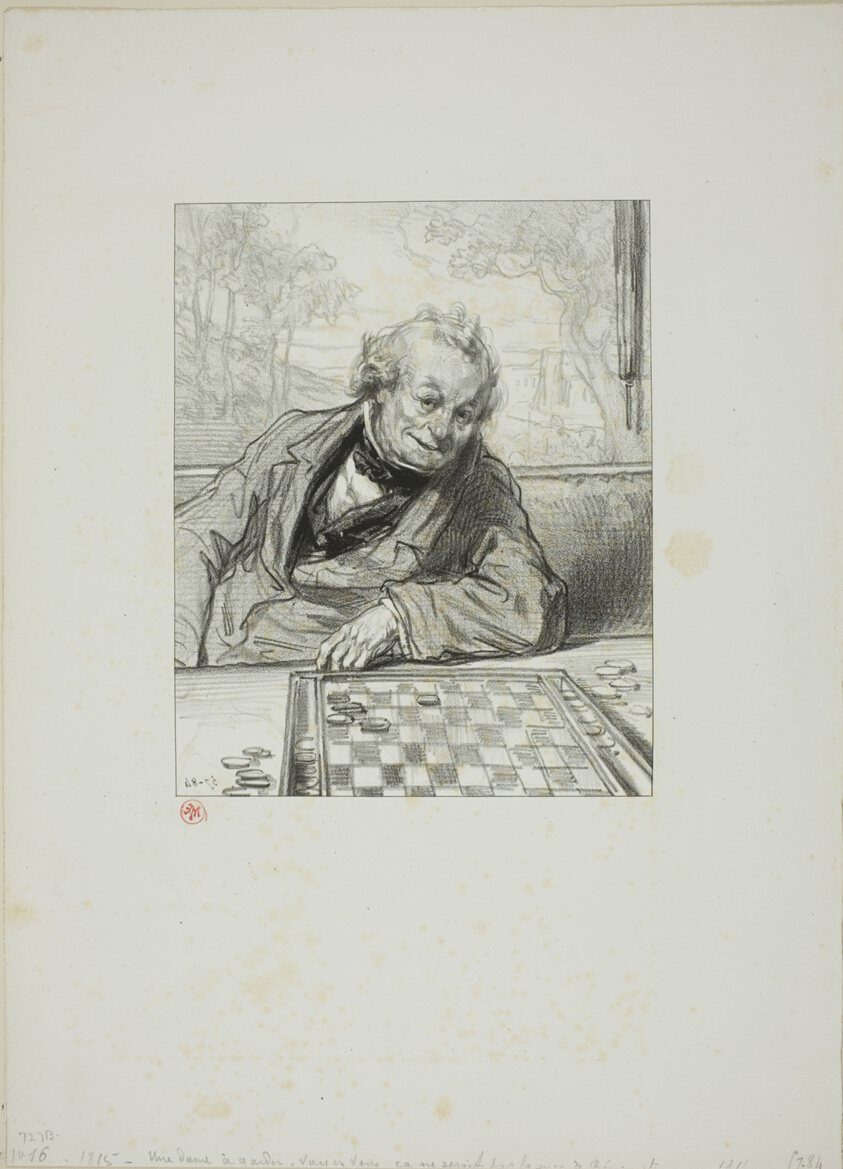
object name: Print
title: Maska and faces: Keeping a Queen, you see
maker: Paul Gavarni (French, 1804-1866)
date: 1857–58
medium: Lithograph in black on ivory wove paper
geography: France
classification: lithograph; print; prints and drawing